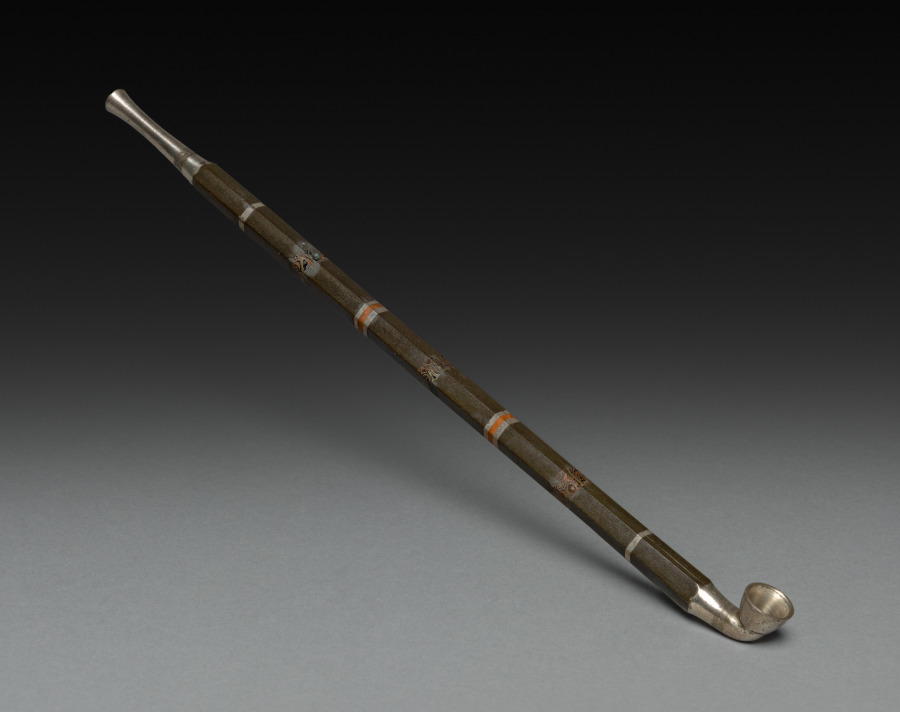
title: Tobacco Pipe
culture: Japan, Edo period (1615–1868)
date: 1700s to mid-1800s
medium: metal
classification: Miscellaneous